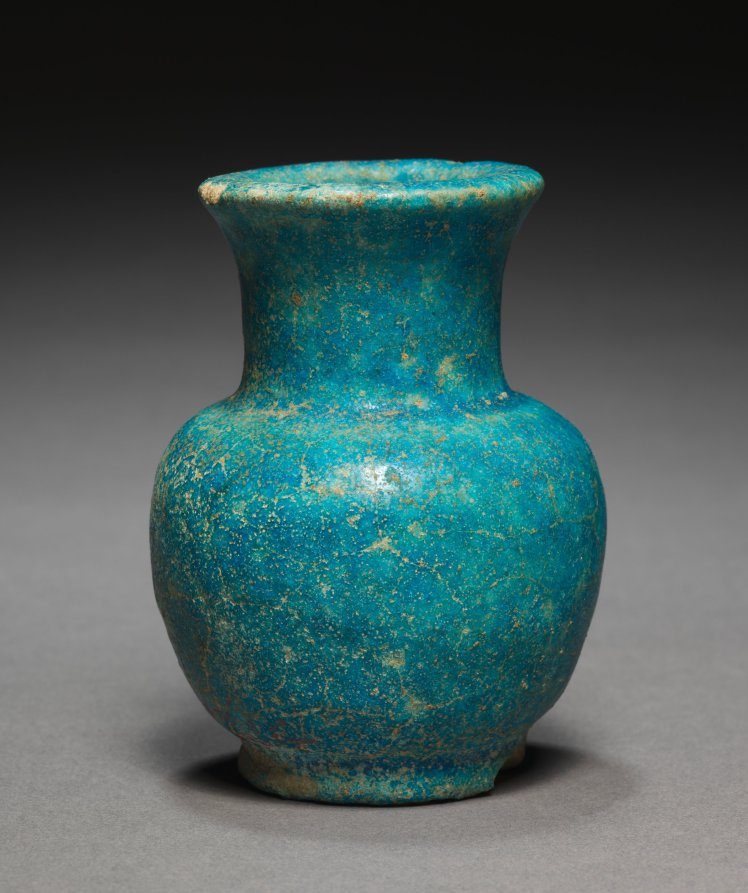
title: Jar with Tall Neck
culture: Egypt, Greco-Roman period (332 BCE–395 CE), Roman empire (30 BCE–395 CE)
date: 30 BCE–395 CE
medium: blue faience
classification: Vessels